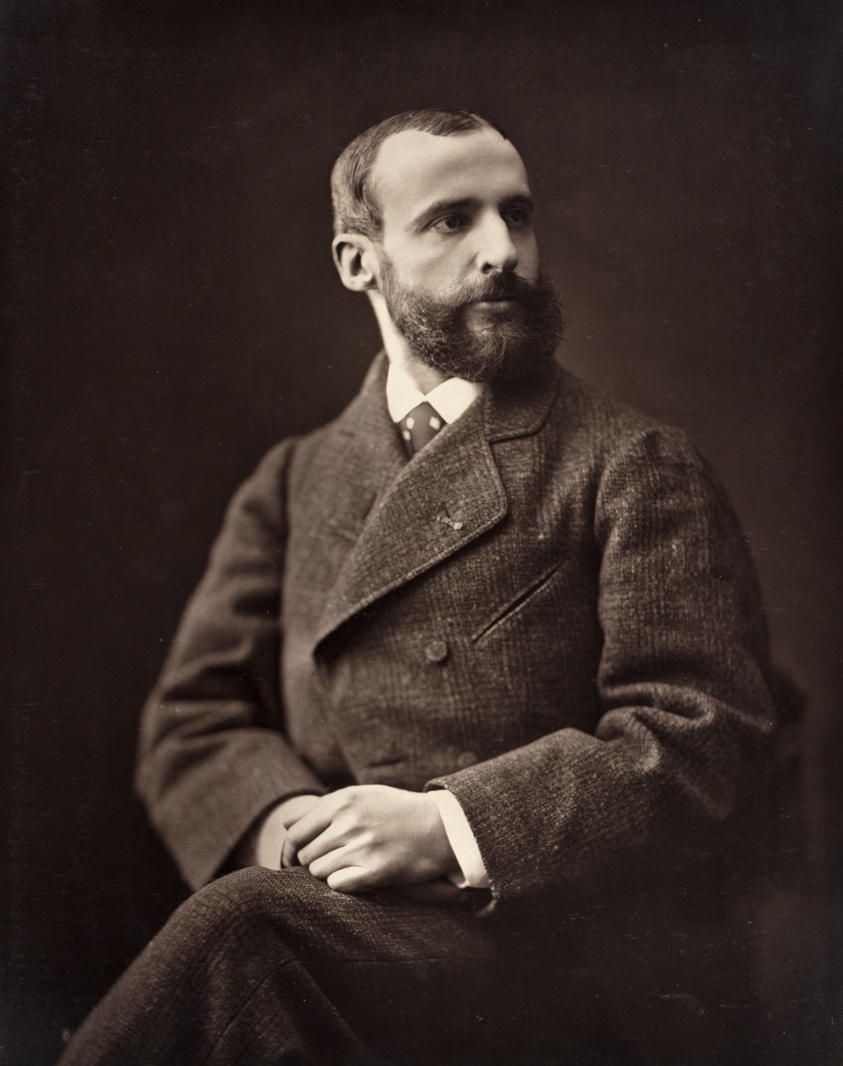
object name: Photograph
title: Francis Planté (French pianist, 1839-1934)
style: 19th century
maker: Nadar (Gaspard Félix Tournachon) (French, 1820–1910)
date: 1865/73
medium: Woodburytype, from the periodical “Galerie Contemporaine Littéraire, Artistique” (1878), volume 5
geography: France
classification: woodburytype; photomechanical process; photography; photograph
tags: Collected by Hugh Edwards, Contemporaine Littéraire